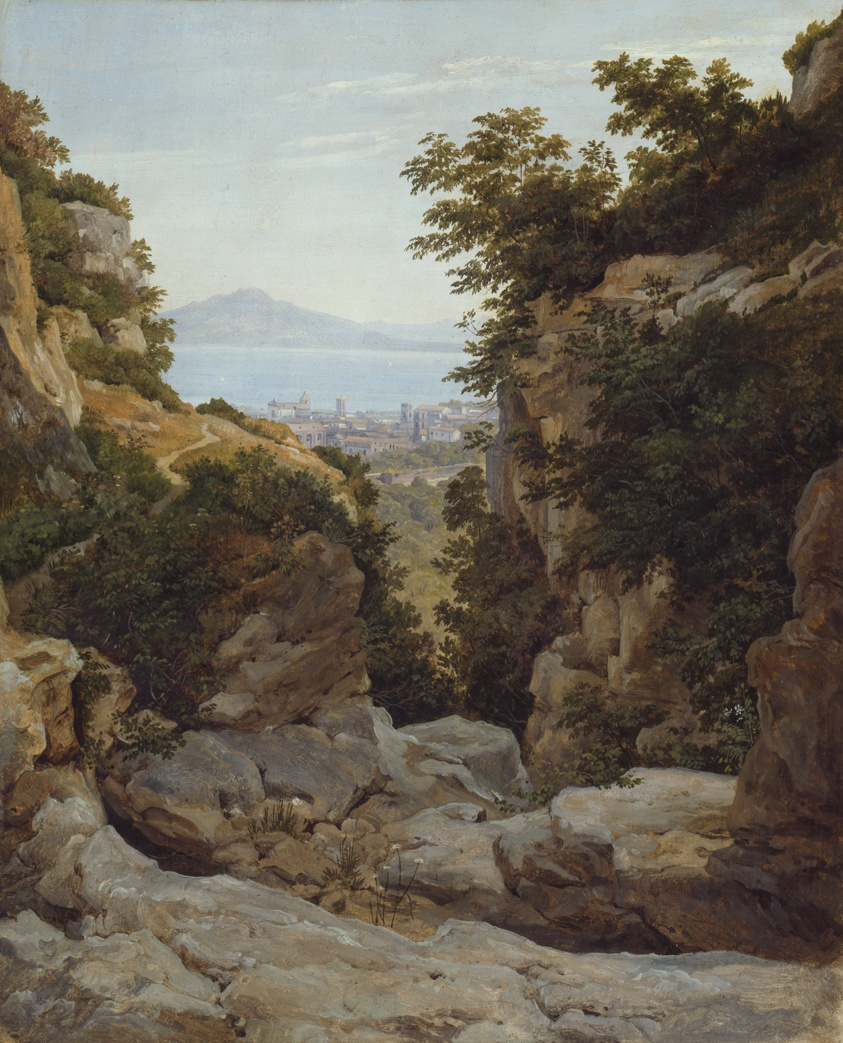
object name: Painting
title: Italian Landscape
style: nineteenth century, 19th century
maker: Attributed to Heinrich Reinhold (German, 1788–1825)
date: 1821/24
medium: Oil on paper mounted on canvas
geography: Germany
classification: oil paintings (visual works); paint; oil on paper; french; painting; european painting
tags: landscape, water, trees, towns, sky, rocks, paths, nature, Italy, green (color), foliage, flowers, clouds, bushes